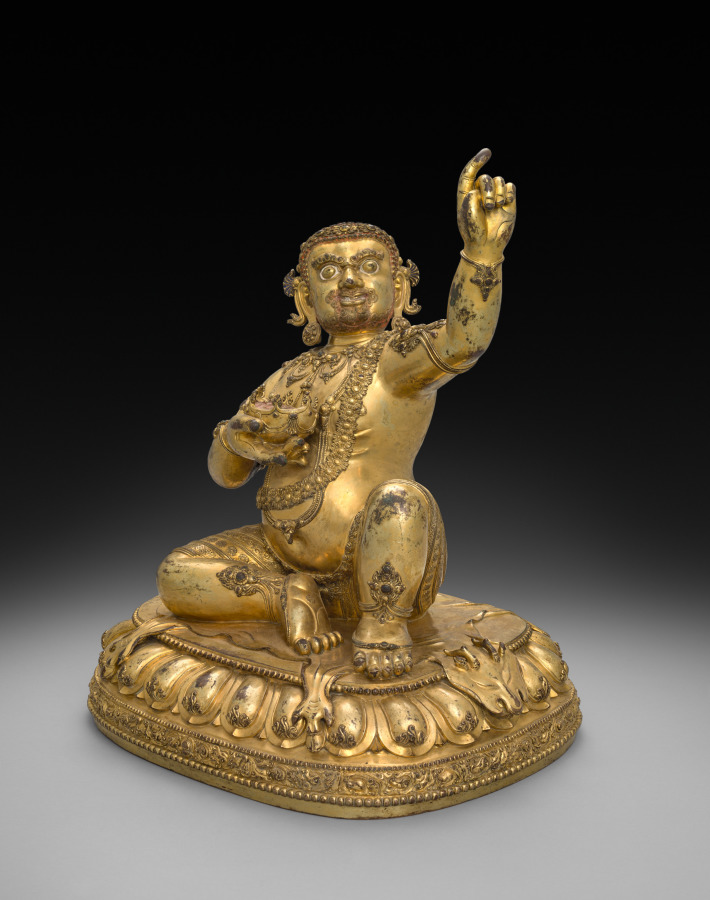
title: Virupa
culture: China, Ming dynasty (1368-1644), Yongle reign (1403-1424)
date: early 1400s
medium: Gilt bronze with silver, stones, and pigment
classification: Sculpture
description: Virupa is one of the great teachers in the history of tantric Buddhism. His posture references his ability to stop the sun; as an enlightened being, he can control phenomena of nature. As a tantric practitioner, he overturns ordinary assumptions about proper behavior, so he overeats, drinks large quantities of liquor, and waits for the king to pay his bill at the tavern. At the edge of the lotus pedestal is an inscription identifying the image as having been made in the imperial kilns of the third emperor of the Ming dynasty in China as a gift to a Tibetan monastic leader. While closely linked to Tibetan styles, the luxurious detailing, special gilding process, and the casting of the ornaments onto the body without use of inlay are specifically Chinese characteristics.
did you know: Virupa's clothing and jewelry are embellished with silver and stones, while pigments enhance his hair and eyes.